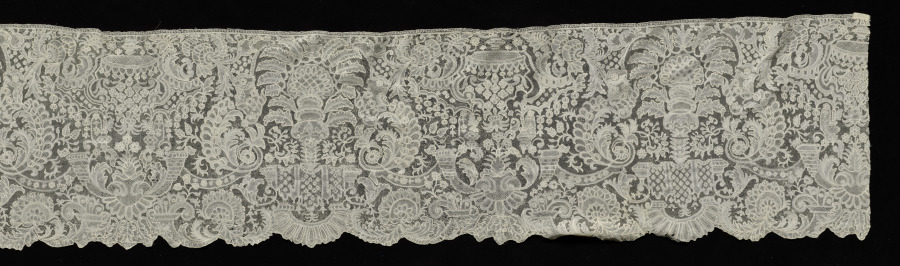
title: Lace Flounce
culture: Belgium, Brussels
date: early 1700s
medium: Bobbin lace (Point d'Angleterre)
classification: Lace